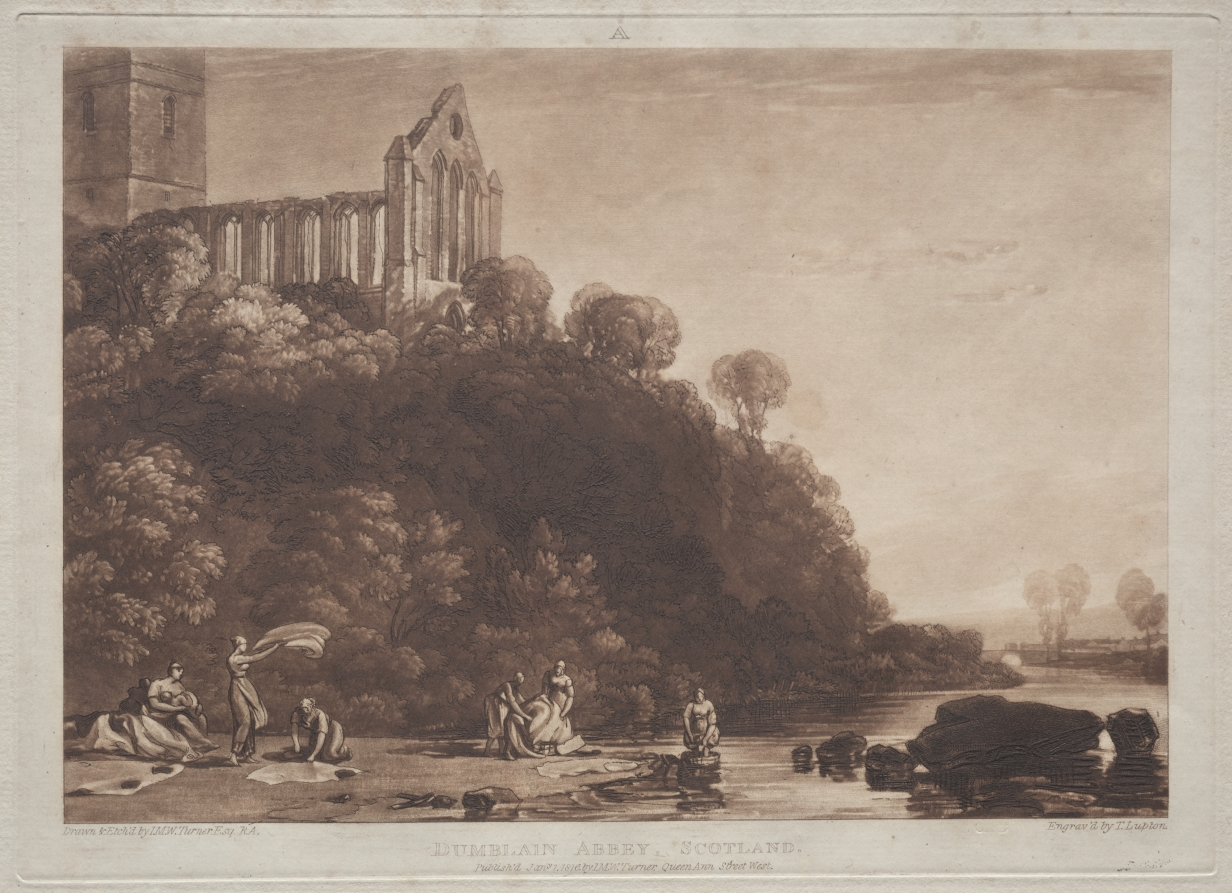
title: Liber Studiorum: Dumblain Abbey, Scotland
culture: England, 19th century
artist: Joseph Mallord William Turner (British, 1775–1851)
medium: etching and mezzotint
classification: Print